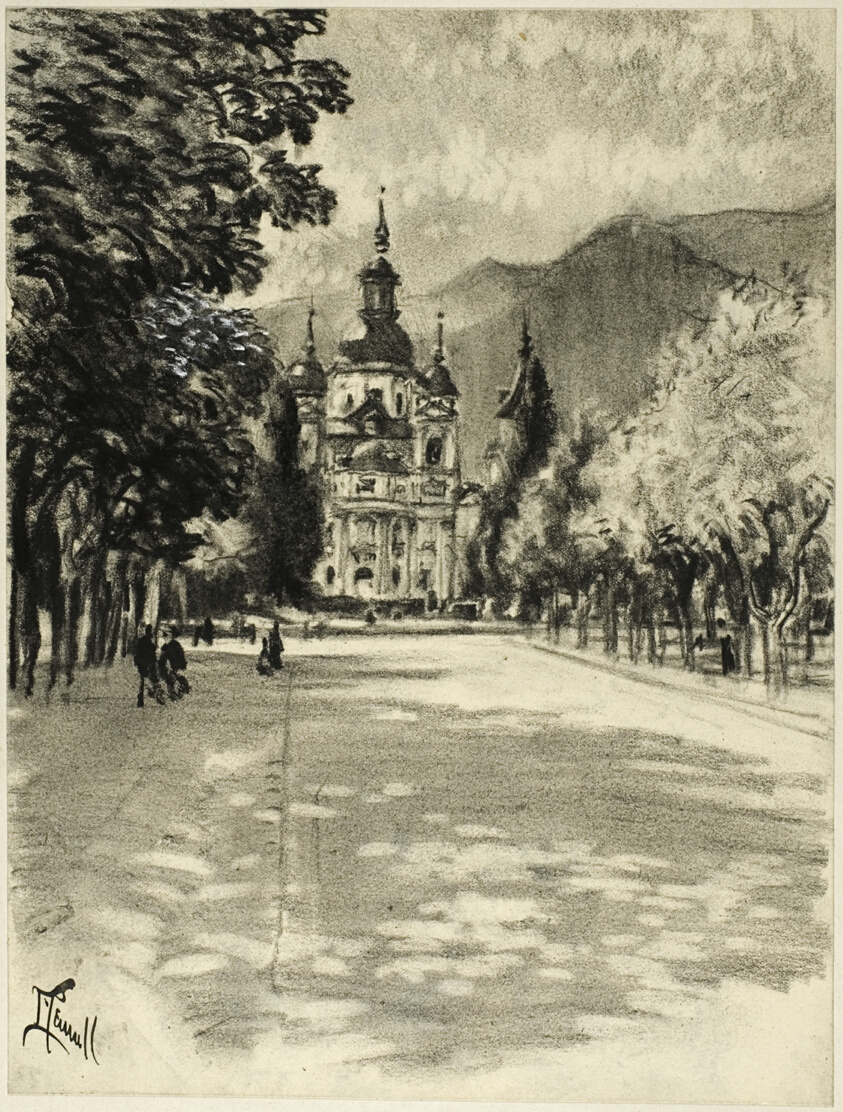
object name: Drawing and Watercolor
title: Saint Ildefonso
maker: Joseph Pennell (American, 1857-1926)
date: c. 1903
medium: Oiled charcoal, with stumping and erasing, heightened with touches of white chalk, on cream wove paper, perimeter mounted on off-white wood pulp laminate board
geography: United States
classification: charcoal; drawings (visual works); prints and drawing